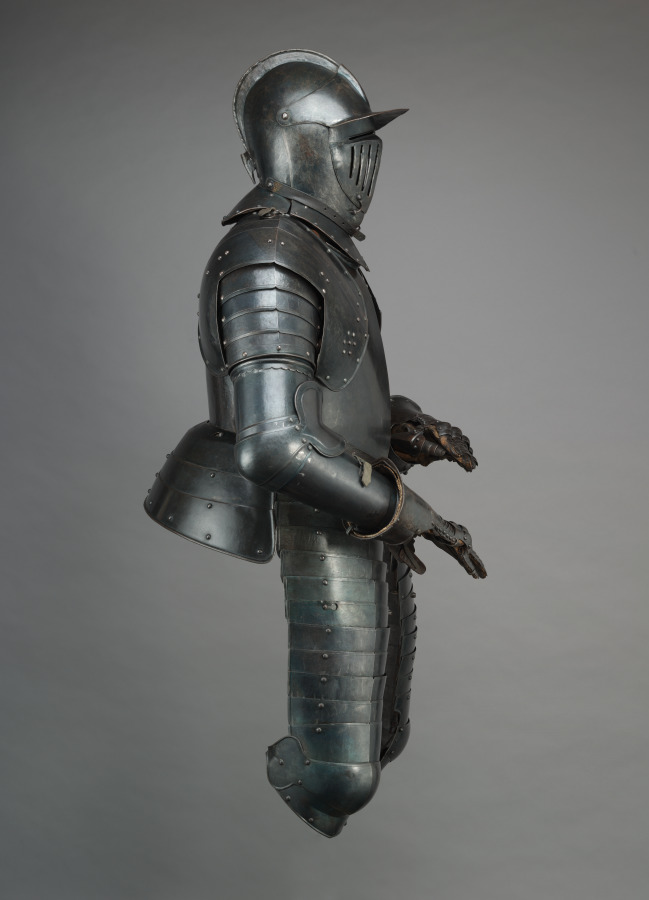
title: Cuirassier's Armor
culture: Austria, Graz(?), early 17th century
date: c. 1600–20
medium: steel (originally blued, now black); leather straps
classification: Arms and Armor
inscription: Proof mark (musket shot) is located on the proper left side of the breastplate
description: The cuirassier was the heavy cavalryman of the late 1500s and early 1600s. Carrying pistols and a sword, he was clad in full armor, like this suit, with the exception of his lower legs, which were protected by heavy riding boots. Shortly after 1650, such heavy cavalry armor disappeared from use. By then, European cavalries had abandoned full armor as impractical against the increased sophistication of firearms. Similar armors survive in the Armory of Graz, Austria.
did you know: This suit of armor is just over 5 1/2 feet tall.